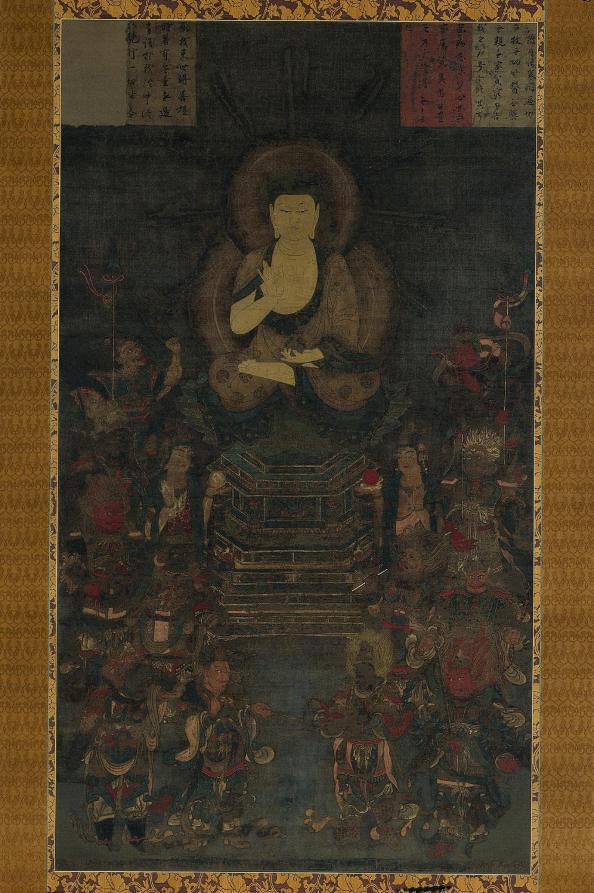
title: Medicine Master Buddha and the Twelve Divine Generals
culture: Japan, Kamakura period (1185–1333)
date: 1200s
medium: Hanging scroll painting; ink, color, gold, and silver on silk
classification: Painting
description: From the 700s, people in Japan began praying to the Medicine Master Buddha (Yakushi Nyorai) for longevity. Yakushi is at the center of this image, flanked by the bodhisattvas of the sun and moon, Nikkō and Gakkō. The Twelve Divine Generals, a group of protective deities, surround him. Yakushi sits in a meditative pose with his right hand in a gesture bestowing fearlessness while his left hand holds a medicine jar. In the upper part of the painting, rectangles simulating decorative paper inscription slips contain excerpts from a sacred text about Yakushi, in which he asks that sick people who speak his name should become well and that all who hear his name might have their purity restored.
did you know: Each of the Divine Generals has an identifying zodiac animal in his hair or headdress.